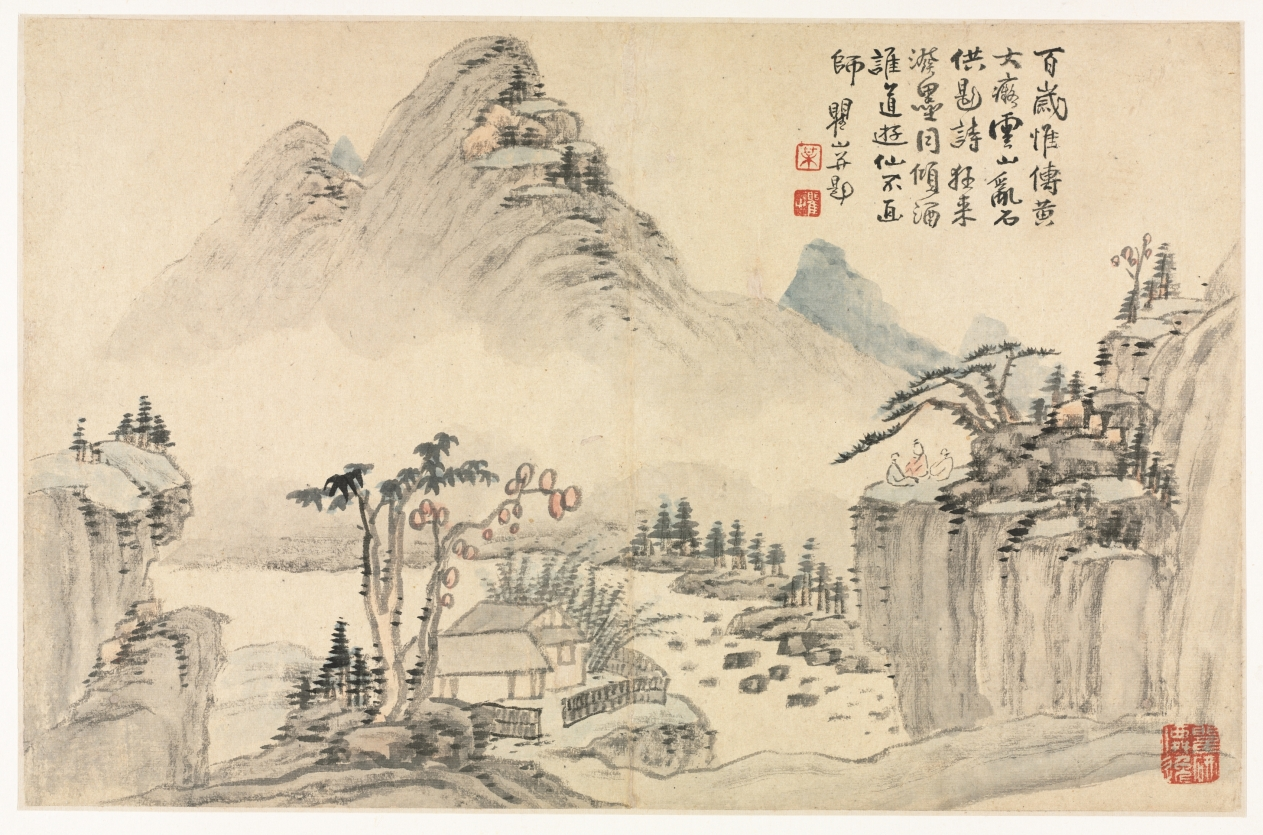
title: Landscapes in Various Styles after Old Masters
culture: China, Qing dynasty (1644-1911)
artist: Mei Qing (Chinese, 1623–1697)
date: 1690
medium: album leaf: ink and color on paper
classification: Painting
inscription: Autumn Leaf I (Formerly Leaf C). Artist's inscription, signature, and seals: For hundreds of years only Huang Dachi [Huang Gongwang] has been handed down from generation to generation./ His cloudy mountains and scattered rocks continue to inspire the composing of poetry./ When frenzied inspiration came, he splashed ink as if pouring out wine;/ Who says this wandering immortal wasn't a painting master? Qushan [painted] and inscribed. [2 seals] Mei; Qushan. [seal, lower right corner] Quxing hsien-i.